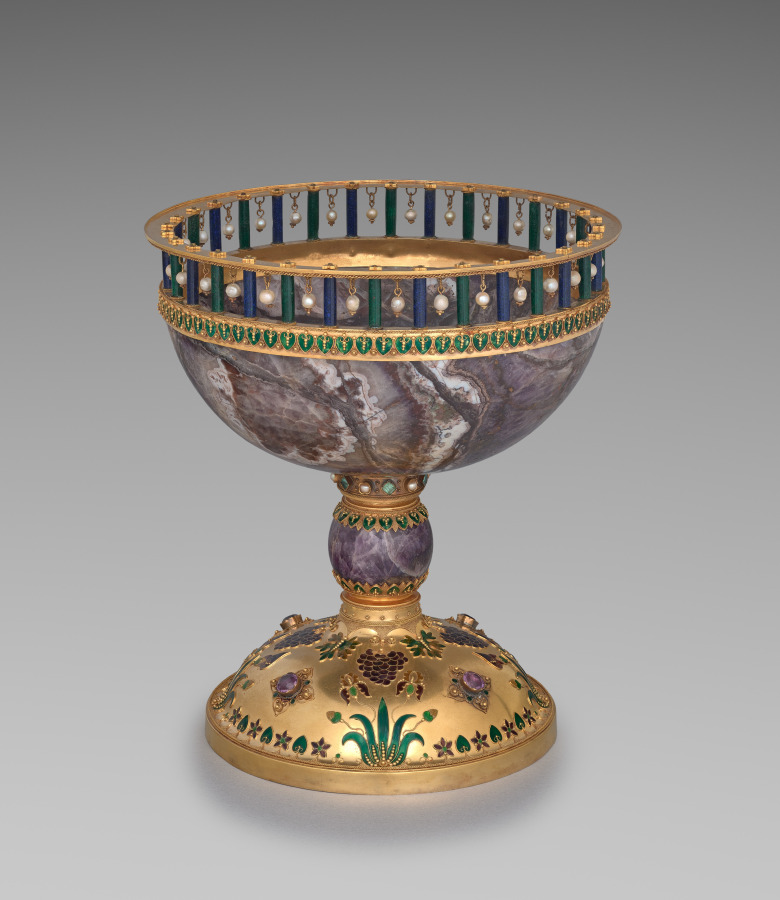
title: Cup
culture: France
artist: Armand Point (French, 1861–1932)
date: c. 1897–99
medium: Gilt copper alloy, cloisonné enamel, amethyst, emerald, ruby, pearls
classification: Metalwork